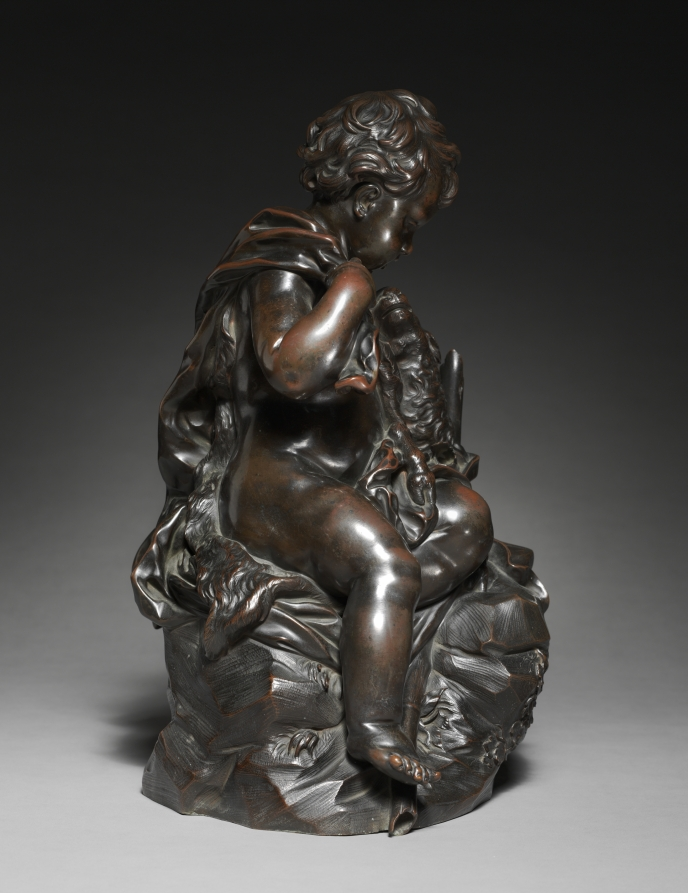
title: Young Saint John and the Lamb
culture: Italy, Florence, 17th century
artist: probably by Giuseppe Piamontini (Italian, 1664–1742)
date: c. 1680–1700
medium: bronze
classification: Sculpture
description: John the Baptist is often accompanied by a lamb as a sign of his intimacy with Christ, the Lamb of God. The depiction of children embracing animals is a motif from antiquity that Piamontini would have known.